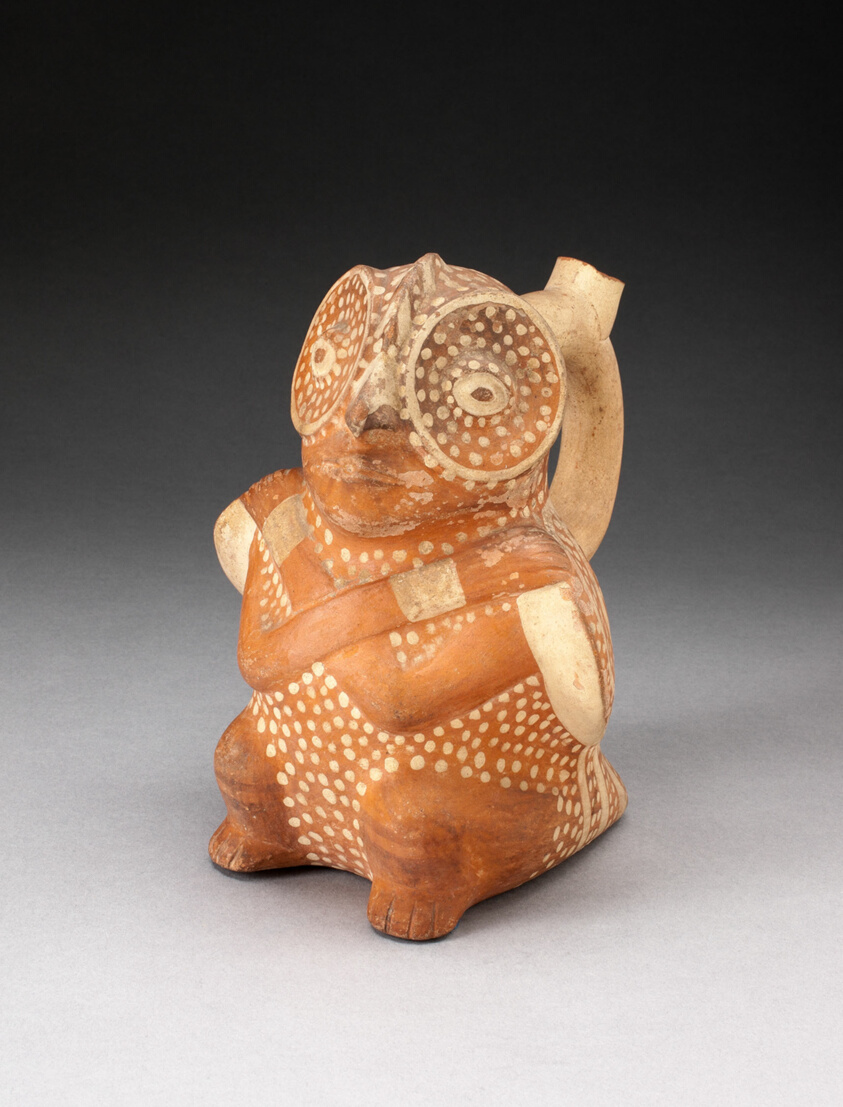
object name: Vessel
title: Handle Spout Vessel in the Form of a Anthropomorphic Owl with Arms Crossed over Chest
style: moche, Arts of the Americas, andes, south american, andean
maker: Moche (Chimbote, Santa Valley, north coast, Peru)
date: 100 BCE–500 CE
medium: Ceramic and pigment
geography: Peruvian North Coast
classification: earthenware; ceramics; vessel; art of the americas